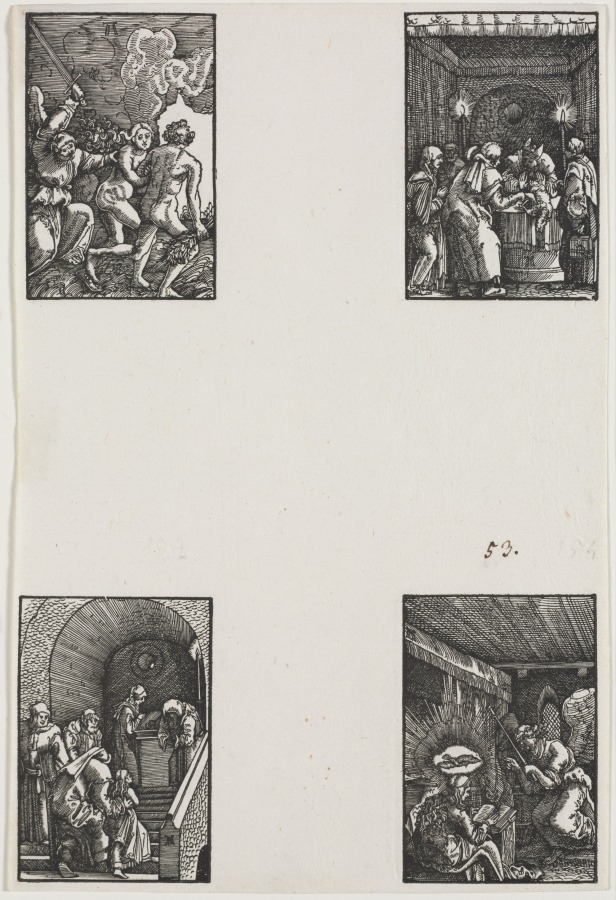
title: The Fall and Redemption of Man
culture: Germany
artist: Albrecht Altdorfer (German, c. 1480–1538)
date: c. 1515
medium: woodcut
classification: Print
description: These eight woodcuts come from a series of forty which illustrate the story of Christian redemption from original sin to the Last Judgement. Probably to maximize printing efficiency and quality, eight woodblocks were printed on each of five sheets of paper, but the subjects are not in the correct chronological order. Prior to sale, the sheets were cut into eight pieces. The sheets in the museum's set were only cut in half, preserving four prints per page. The numbers after the titles of the individual images indicate each scene's place within the narrative. By 1513, Altdorfer had already executed a number of small, finely detailed engravings. Because it is difficult to achieve the same degree of precision using woodcut, The Fall and Redemption of Man is a technical tour de force. Probably inspired by Albrecht Dürer's Small Passion (1511)-but almost double the size-the only contemporaneous comparable set of fine miniature woodcuts, Dance of Death, was designed by Hans Holbein in about 1526 (on view nearby).